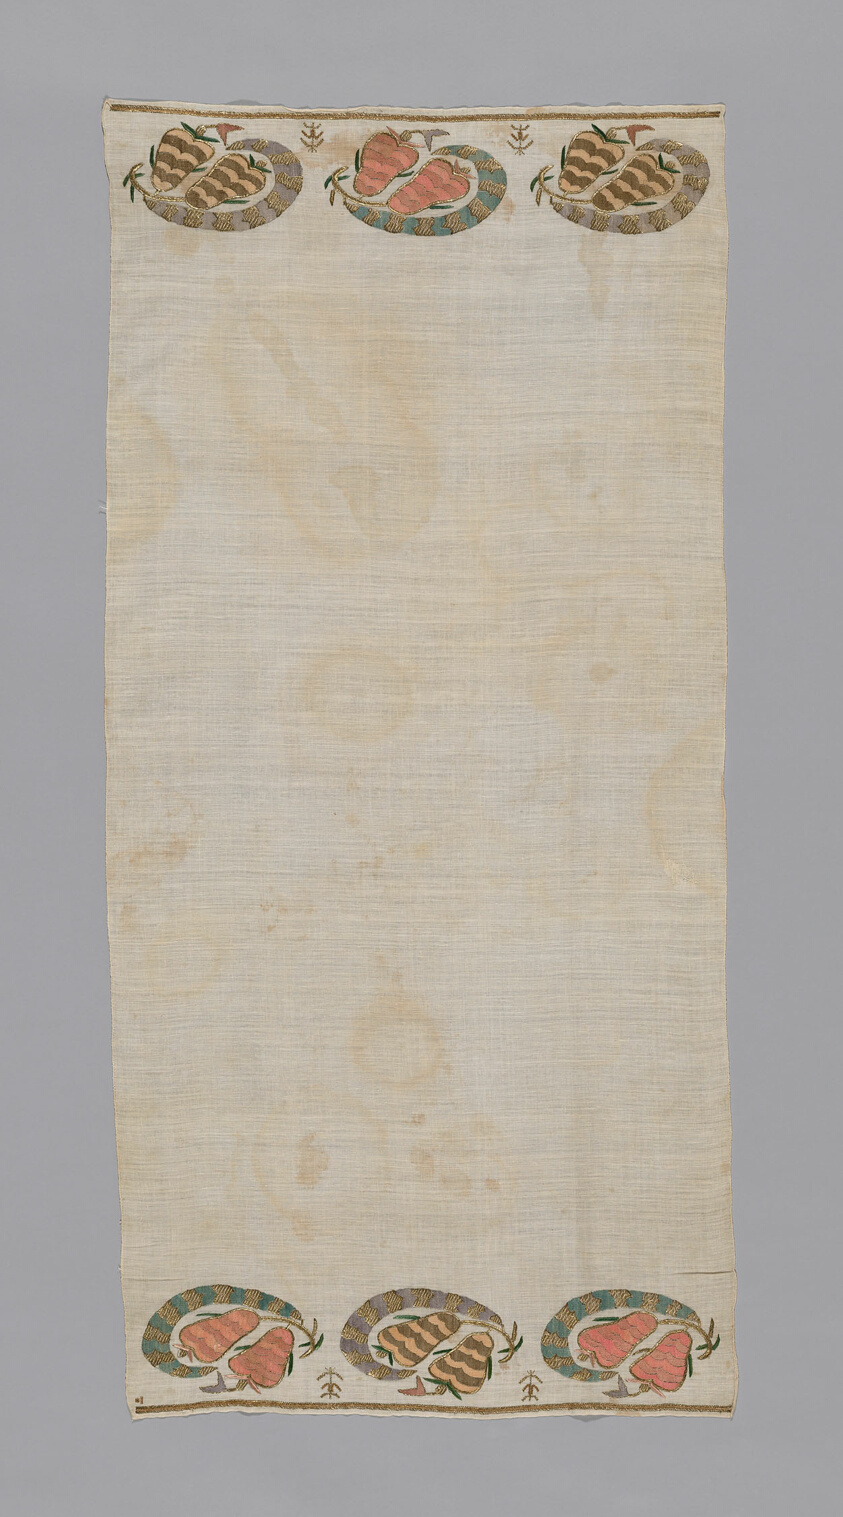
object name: Textile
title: Towel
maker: Turkey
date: 1875/1900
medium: Embroidered in silk and metal thread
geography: Turkey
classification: textile; needlework (visual works); weaving